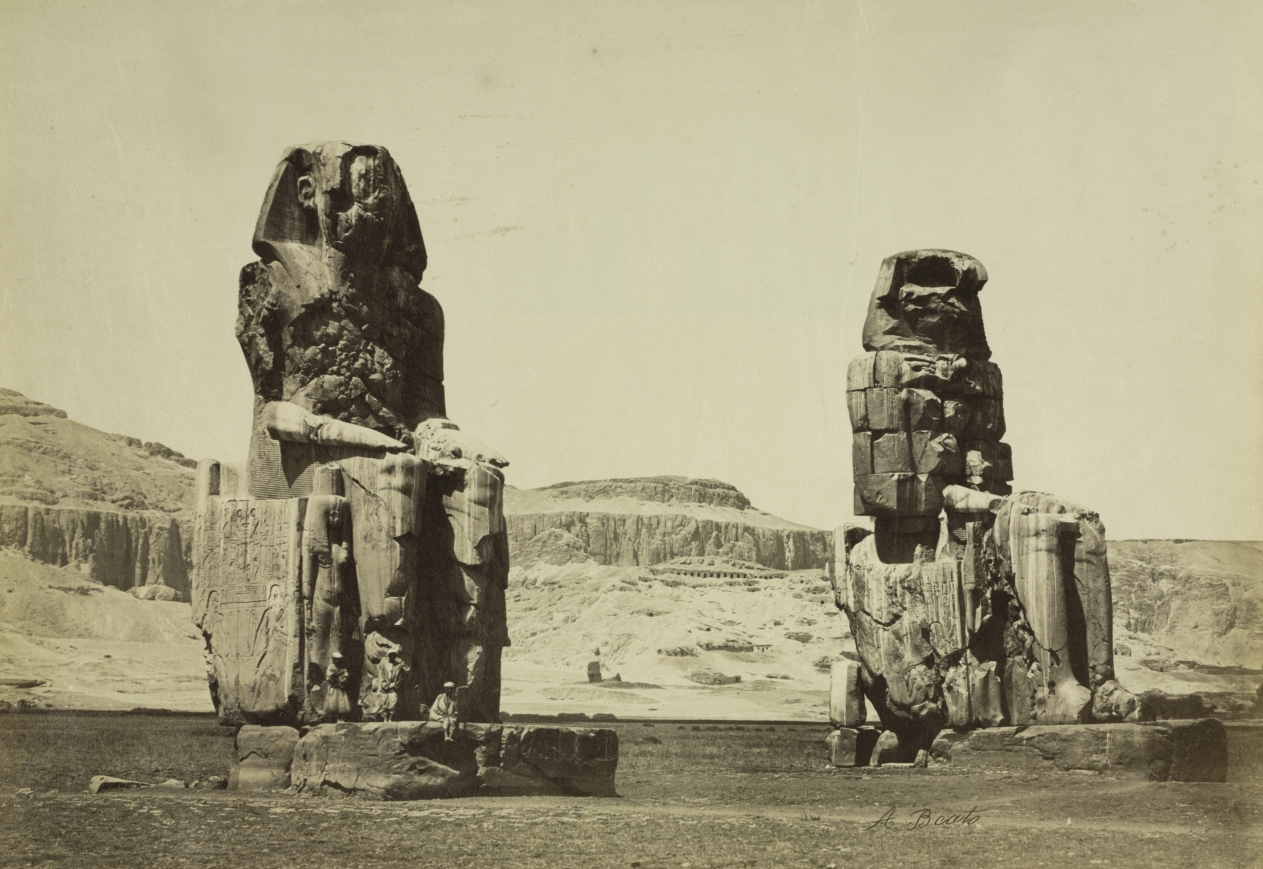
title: The Colossi of Memnon, Thebes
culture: England, 19th century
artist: Antonio Beato (British, c. 1825–1903)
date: c. 1860s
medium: albumen print from wet collodion negative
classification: Photograph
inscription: Written on negative: "A Beato [signed]"